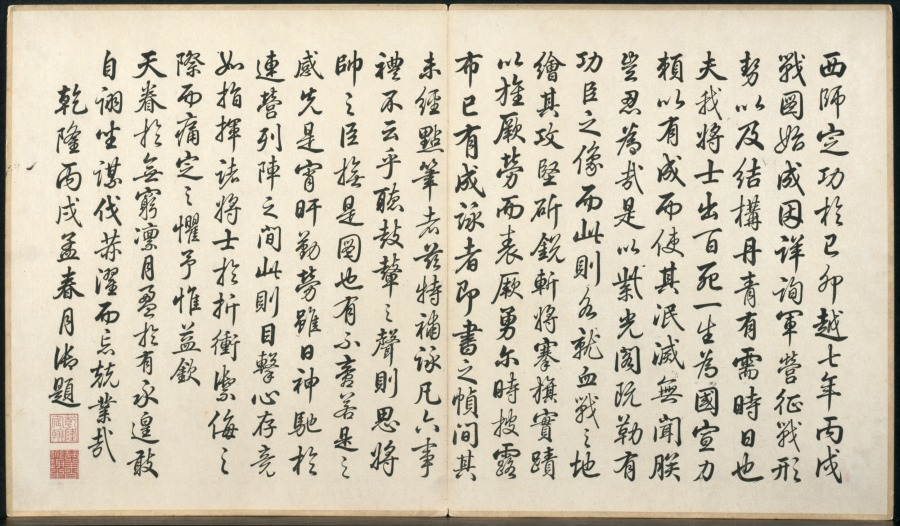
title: Battle Scenes of the Quelling of Rebellions in the Western Regions, with Imperial Poems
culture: China, Qing dynasty (1644–1911), Qianlong reign (1736–95)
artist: Giuseppe Castiglione (Italian, 1688–1766)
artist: Jean Damascene Sallusti (Italian, d. 1781)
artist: Jean Denis Attiret (French, 1702–1768)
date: c. 1765–74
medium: Etchings, mounted in album form, 16 leaves plus two additional leaves of inscriptions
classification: Print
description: This set of etchings was commissioned by Emperor Qianlong to record in pictorial terms the courage of his generals and soldiers in quelling the rebellions in the Western Regions. Qianlong added his own poem to each of the etchings, indicating his appreciation and pride in this demonstration of military might. "Western Regions" refers to the present-day Xingjiang province, often described in Western writing as "Central Asia."